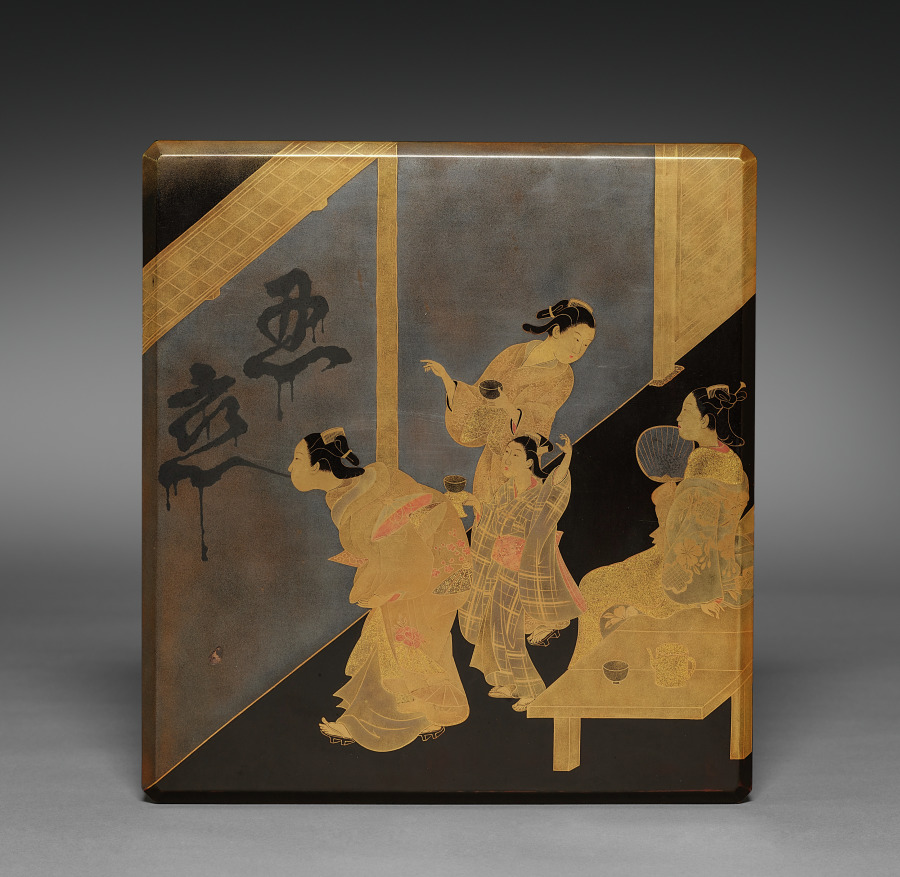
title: Writing Box with Spitting Courtesan (lid)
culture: Japan, Edo period (1615–1868)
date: early to mid-1800s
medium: Lacquered wood with maki-e (image made of sprinkled gold dust)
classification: Lacquer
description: The design on this writing box shows a courtesan who has just completed an impressive feat of spitting the term shinobukoi (忍恋), which could be translated as “hidden love” or “unrequited love,” on an earthen wall. The phrase appeared in classical Japanese poetry anthologies produced by nobles writing in ink on the finest decorated papers. Here, the confining walls of the brothel district become a space for public announcement in graffiti, with the medium being perhaps tea.